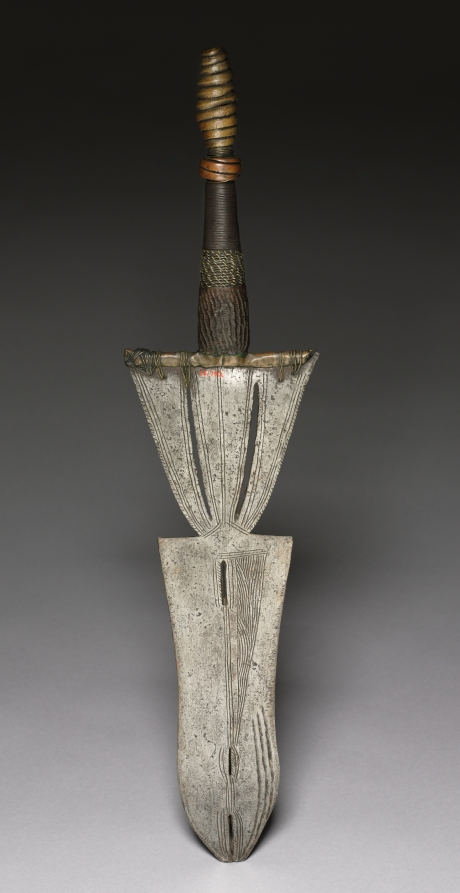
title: Knife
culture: Africa, Central Africa, Democratic Republic of Congo, Bangala-style maker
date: before 1916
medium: Iron, copper alloy, wood, and cloth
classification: Arms and Armor